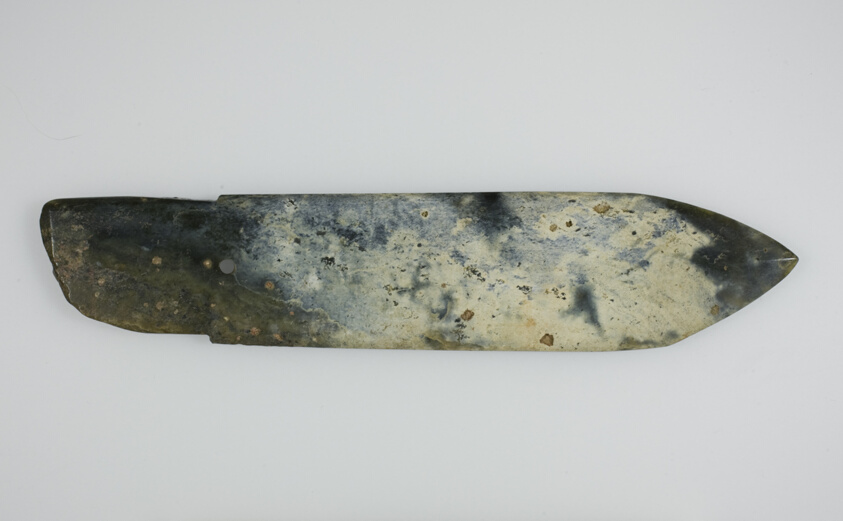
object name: Arms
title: Dagger-Blade (Ge)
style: Chinese (culture or style)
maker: China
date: Shang dynasty ( c. 1600–1046 B.C.), middle/late Shang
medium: Jade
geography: China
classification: jade; asian art; arms